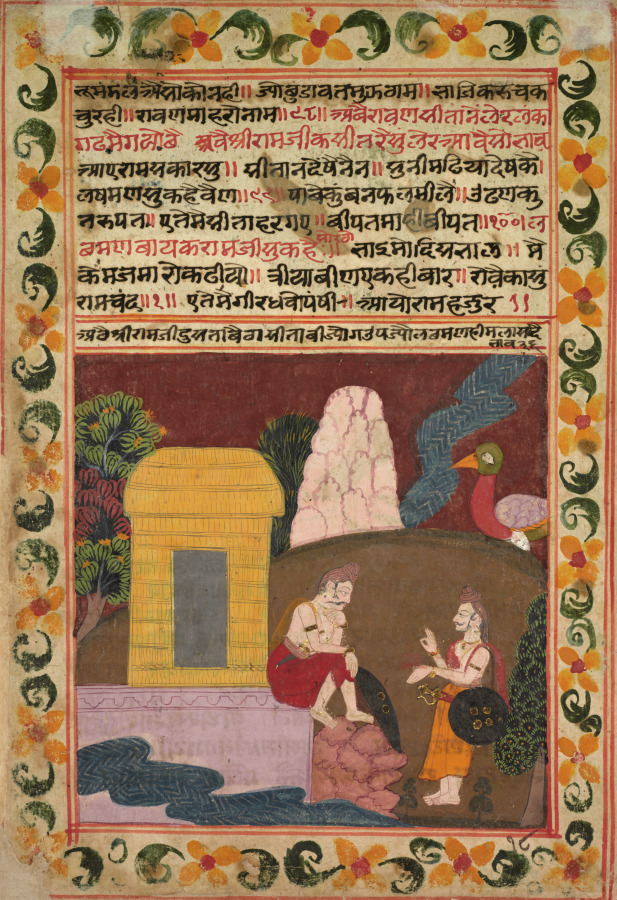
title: Jatayu approaches Rama and Lakshmana who are wondering where Sita could be, folio 18 (verso) from a Chandana Malayagiri Varta (Story of King Chandana and Queen Malayagiri) of Karamachand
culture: Northwestern India, Rajasthan, Rajput Kingdom of Kishangarh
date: 1744–45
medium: Gum tempera, ink, and gold on paper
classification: Painting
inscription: [[caption above image]] aṭhai śrī rāmajī dusatā baiṭhā sītā bījyoga ūpajyau lachamaṇa hī malāsa dai / bhāva 36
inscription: [[text above image and caption]] bhūmaṁḍala aiso ko nahī || jyo chuḍāvata mujha ṭhāma || bhāji karu caka / cura hī || rāvaṇa māharo nāma ||98|| abai rāvaṇa sītā ne lera laṁka / gaḍha mai gayo chai avai śrī rāmajī ka sīta rai suṁ lera āvai so bhāva / āe rāma sakāra su || sītā na deṁkhai naina || sunī maḍhiyā dekha kai | / lakhamaṇa su kahai vaiṇa ||99|| pābe kuṁ banaphala mīlaiṁ || ūḍhaṇa ku / tarupata || ete mai sītā hara gae || bīpata māhībīpata ||100| la / chamaṇa bāyaka rāmajī su kahaiḥ || soraṭho bhāi mo disa bhāla || mai / kema ja māro kaḍhiyo || trīyā bīṇa eka hī bāra || rovai kāsuṁ / rāmacaṁda ||1|| ete mai gīradhavo paṁkhī || āyo rāma hajura ||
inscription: [[lower right corner]] 18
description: Rama sits in front of the empty hut, while his brother Lakshmana tries to reassure him. The giant vulture Jatayu limps over a hill in the distance, still weighed down by the stones he swallowed. He approaches to tell Rama and Lakshmana that the demon Ravana abducted Sita.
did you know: The folio number 18 is written in black in the lower right corner.